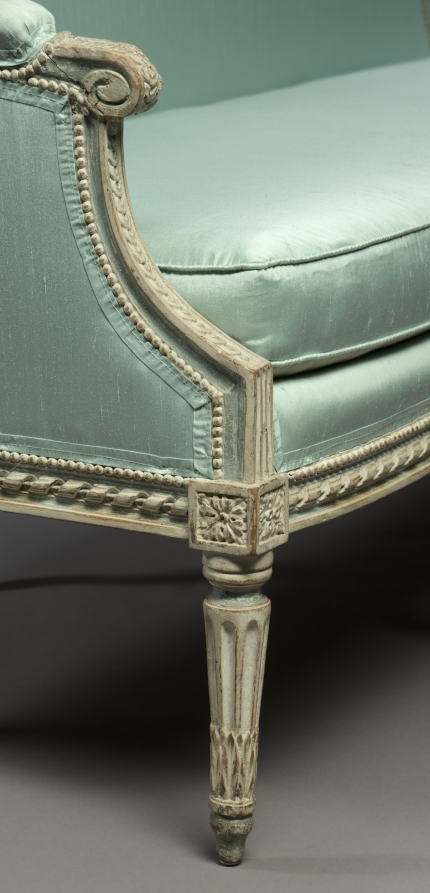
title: Settee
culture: France, 18th century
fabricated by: Philippe-Joseph Pluvinet (French, 1793)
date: c. 1780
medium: painted wood and upholstery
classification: Furniture and woodwork